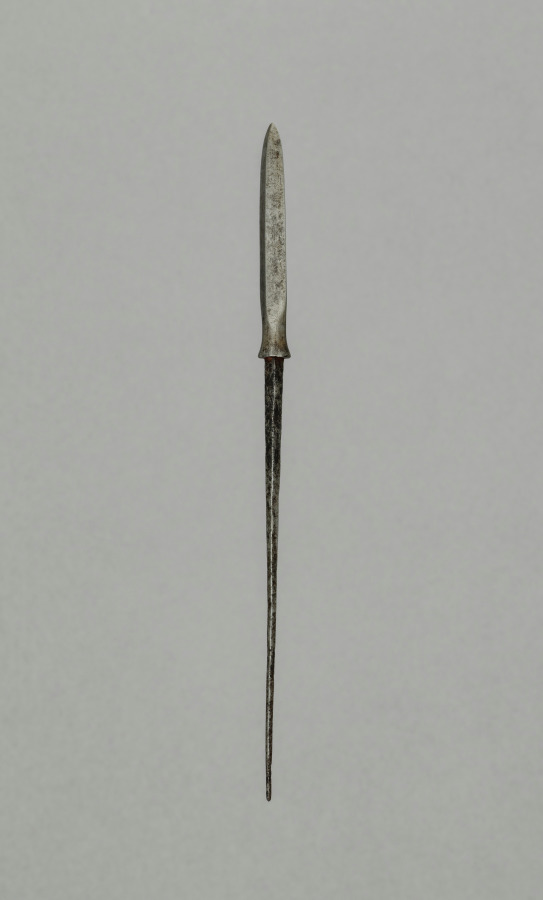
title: Arrow Point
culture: Japan, Edo period (1615–1868)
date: 1700s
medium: steel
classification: Arms and Armor